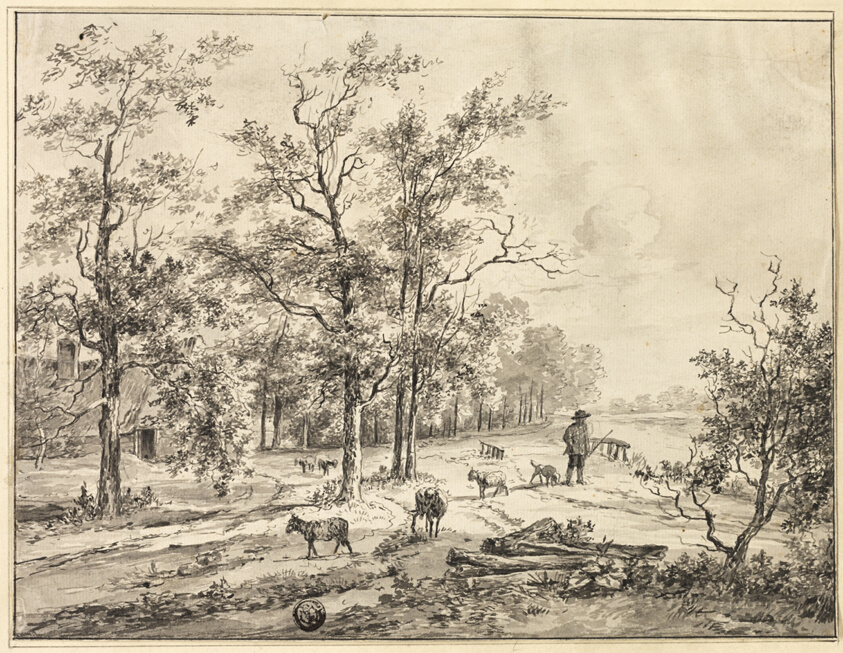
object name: Drawing and Watercolor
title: Goatherd and Goats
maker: Bruno van Straaten (Dutch, 1786-1870)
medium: Pen and black ink, with brush and gray wash, over traces of graphite, on ivory laid paper, tipped onto card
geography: Holland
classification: ink or chalk wash; drawings (visual works); prints and drawing